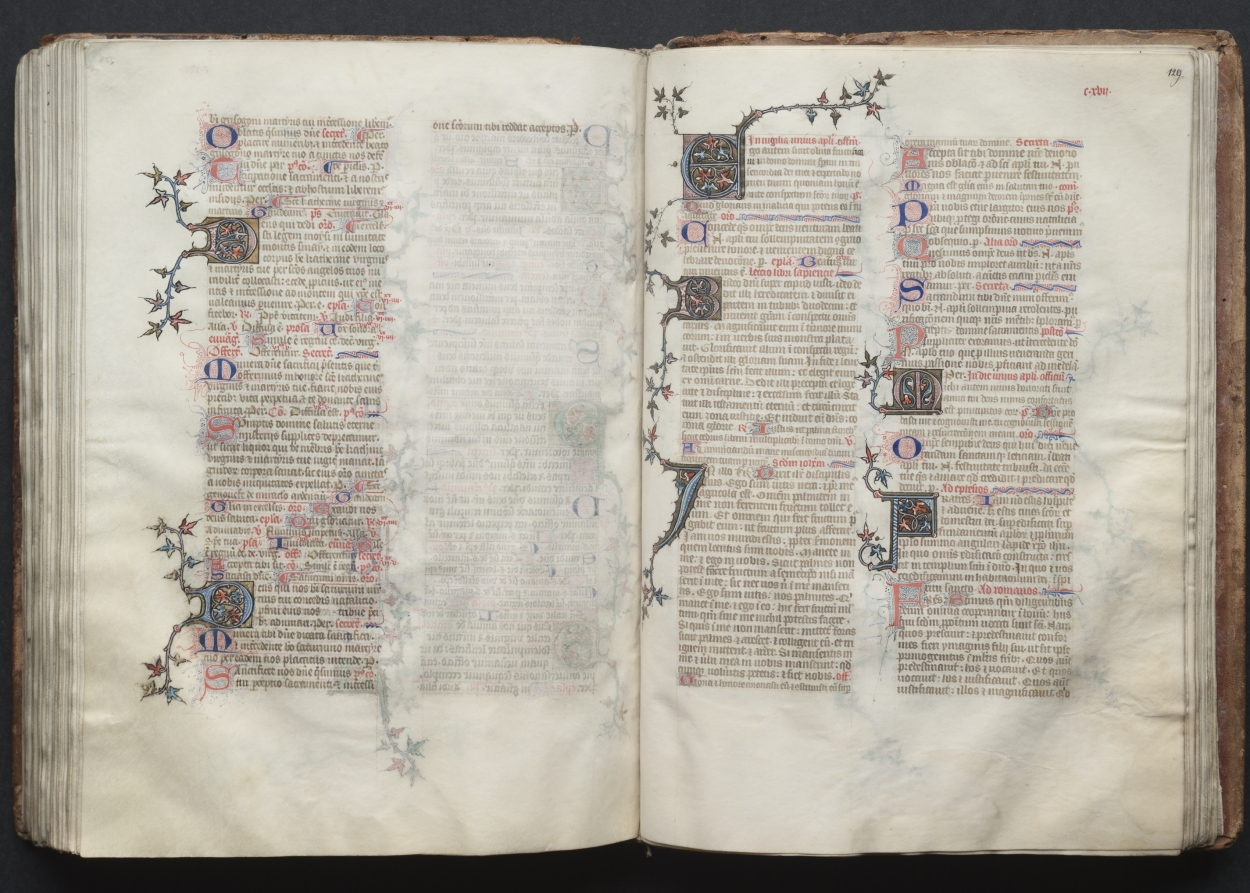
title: The Gotha Missal: Fol. 129r, Text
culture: France, Paris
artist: Master of the Boqueteaux (French)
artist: and Workshop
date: c. 1375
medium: ink, tempera, and gold on vellum; blind-tooled leather binding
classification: Bound Volume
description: The style and quality of this manuscript's decoration is typical of deluxe Parisian books made for aristocratic or royal patrons. Most of the book's decoration appears to be the work of the Master of the Boqueteaux, an artist active at the court of King Charles V (died 1380). His style was apparently shared by a number of book illuminators working in and around Paris. It is very possible that the Gotha Missal belonged to Charles V, but is not provable because the manuscript has no royal portraits and lacks a colophon. Given the book's magnificent decoration, however, it would seem that it was produced for a Valois prince, if not for the king himself. The manuscript receives its name from the German dukes of Gotha, its later owners.